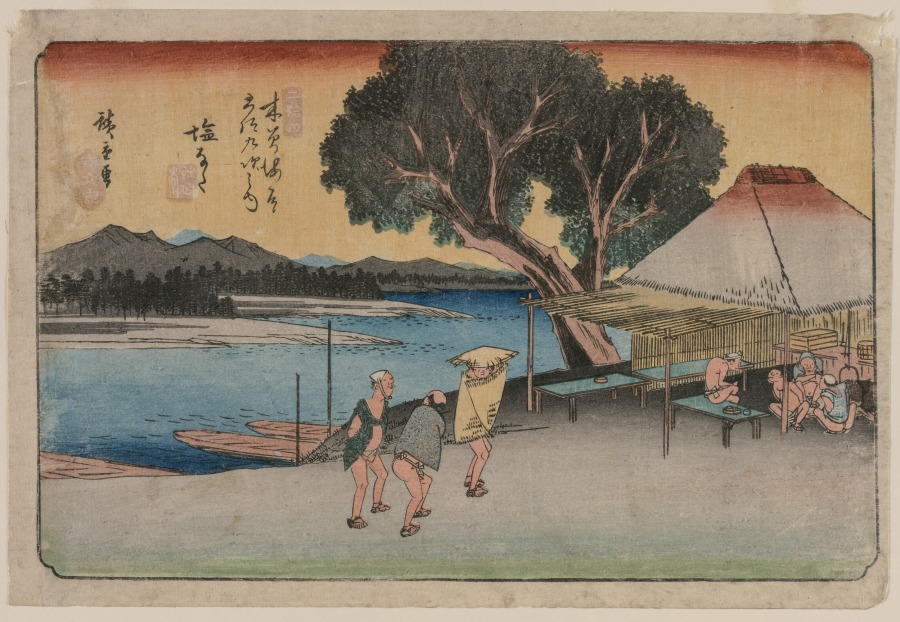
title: The Sixty-Nine Stations of the Kiso Highway: Shionata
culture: Japan, Edo period (1615–1868)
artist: Utagawa Hiroshige (Japanese, 1797–1858)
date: 1797–1858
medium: color woodblock print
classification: Print